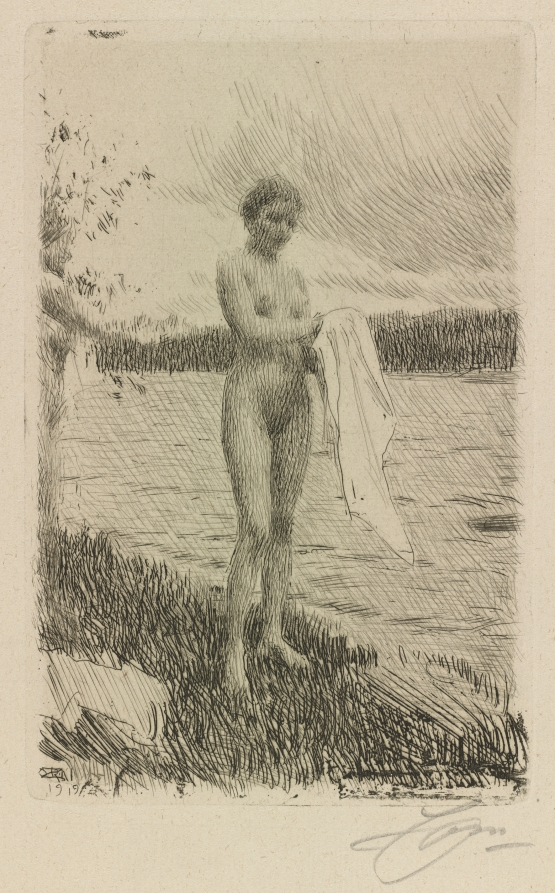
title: Dal River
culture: Sweden, 20th century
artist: Anders Zorn (Swedish, 1860–1920)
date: 1919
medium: etching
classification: Print